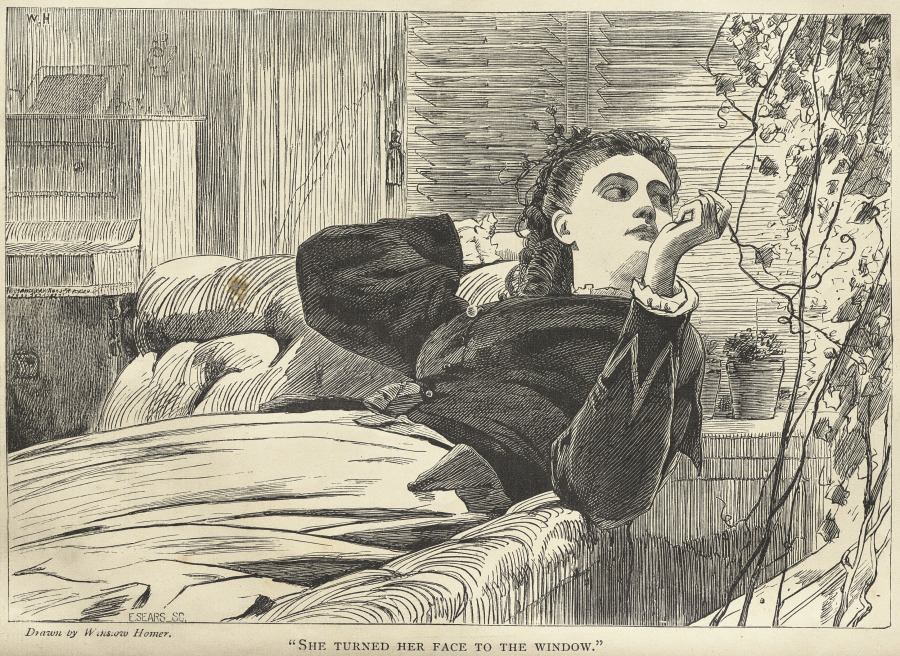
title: "She Turned her Face to the Window"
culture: America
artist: Winslow Homer (American, 1836–1910)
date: 1868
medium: wood engraving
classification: Print